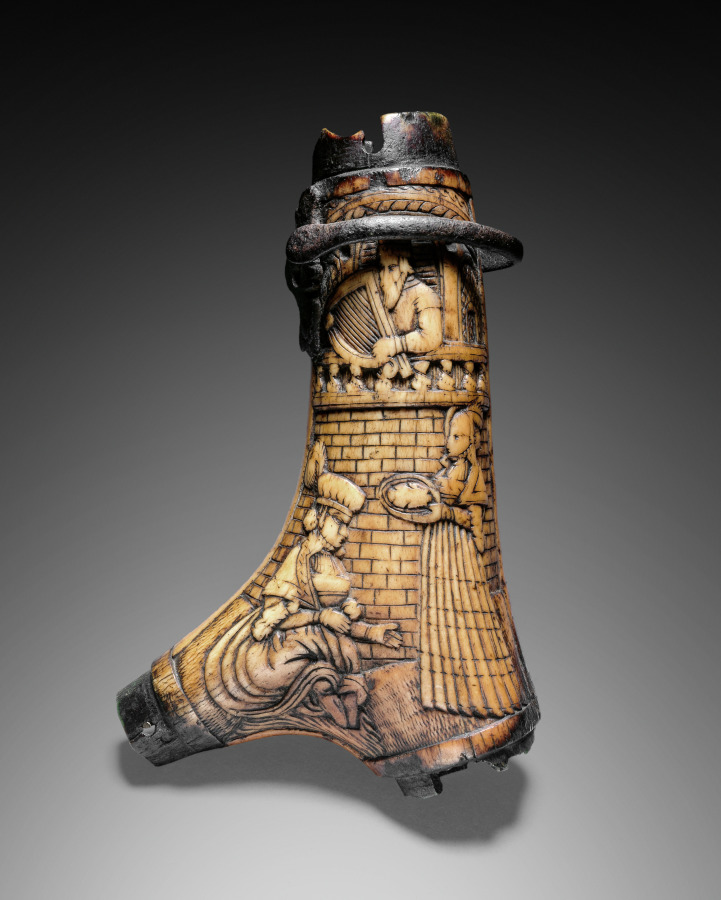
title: Powder Flask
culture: Germany, late 16th Century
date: c. 1580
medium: staghorn (two branches) carved with relief, scene of David and Bathsheba; iron suspension loop; mounts missing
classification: Arms and Armor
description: Powder flasks are small, portable containers designed to hold gunpowder. From the 1400s to the 1800s, powder flasks were indispensable for charging and priming firearms of all types. Without powder flasks firearms were of little use to their owners. Many highly decorated flasks rank as works of art. During the 1500s, they were frequently decorated with images of famous historical figures. Here the figures of King David and Bathsheba derive from the Old Testament.